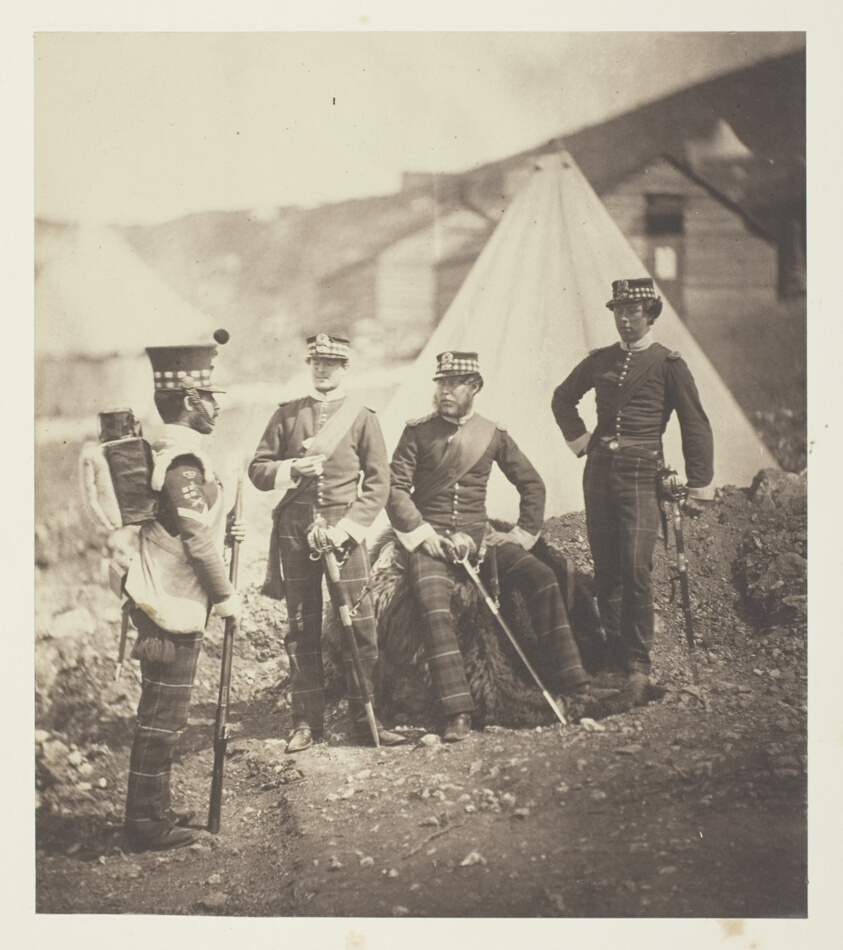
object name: Photograph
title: Officers of the 71st Highlanders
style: 19th century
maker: Roger Fenton (English, 1819–1869)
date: 1855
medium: Salted paper print, plate 16 from the album "Photographs Taken in the Crimea" (1856)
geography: England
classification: salted paper print; photographic process; photography; photograph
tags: Collected by Hugh Edwards, Crimea 1856